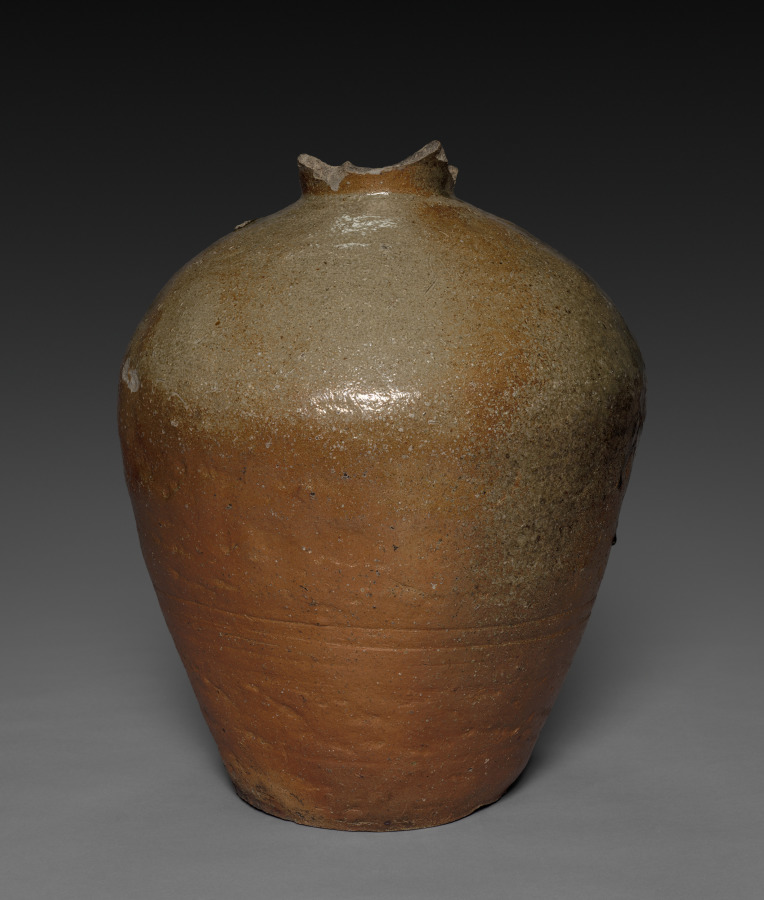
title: Storage Jar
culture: Japan, Muromachi period (1392–1573)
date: 1400s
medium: Stoneware with natural ash glaze (Tamba ware)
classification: Ceramic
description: For centuries the Tokai region surrounding present-day Nagoya has been an especially fertile ceramic production center. One site was a group of kilns located west of Kyoto, in Tamba province. Nestled in a farming valley in the mountains behind the modern port of Kobe, Tamba required a regular supply of storage vessels and sturdy containers for distributing grain. This jar was formed in three sections, each fluted to the next and turned on a potter's wheel to scrape off excess material. Both interior and exterior walls were smoothed with a wooden or bamboo tool, leaving markings on the lower body and shoulder. The neck opening is small and wheel-turned, as is the neck, which bears fine lines and a matte-glazed surface. The lustrous green glaze that highlights the jar once trailed from the vessel's lip and clung to the entire shoulder wall, mingling with the warm, orange-brown tone of the clay body underneath. The surface is crackled with craters where stone material within the clay migrated up to the surface during firing and then fell away. The result is a particularly rich and varied "landscape," typical of Tamba ware's subdued, earthy vitality.